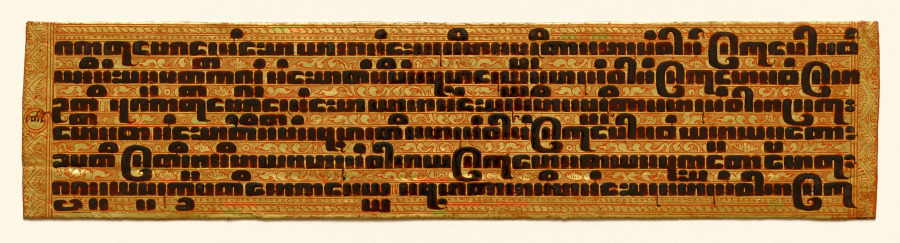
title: Text, folio 10 (verso) from a Kammavacha: Buddhist ordination text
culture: Myanmar (Burma)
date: 1800s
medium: Leaf: lacquer and gilding on cloth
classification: Manuscript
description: In premodern Burma, lay people commissioned lavishly ornamented manuscripts for ceremonial occasions, when officiants would read aloud from the text. Written in black lacquer, the text is in the language of Pali written in a Burmese script. It contains ordination rites and procedures for monastic ceremonies. The second to last page is covered with intricately drawn, winged celestial beings (nats) in gestures of praise. They fly amid intertwining vegetation—denoting bounty—that grows from serpentine forms that refer to rain clouds. Lionlike forms inhabit the space with them. The top and bottom covers are equally ornamented with jeweled floral patterning.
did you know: The Pali text of this manuscript is written in Burmese square script, which is also known as "tamarind seed script."